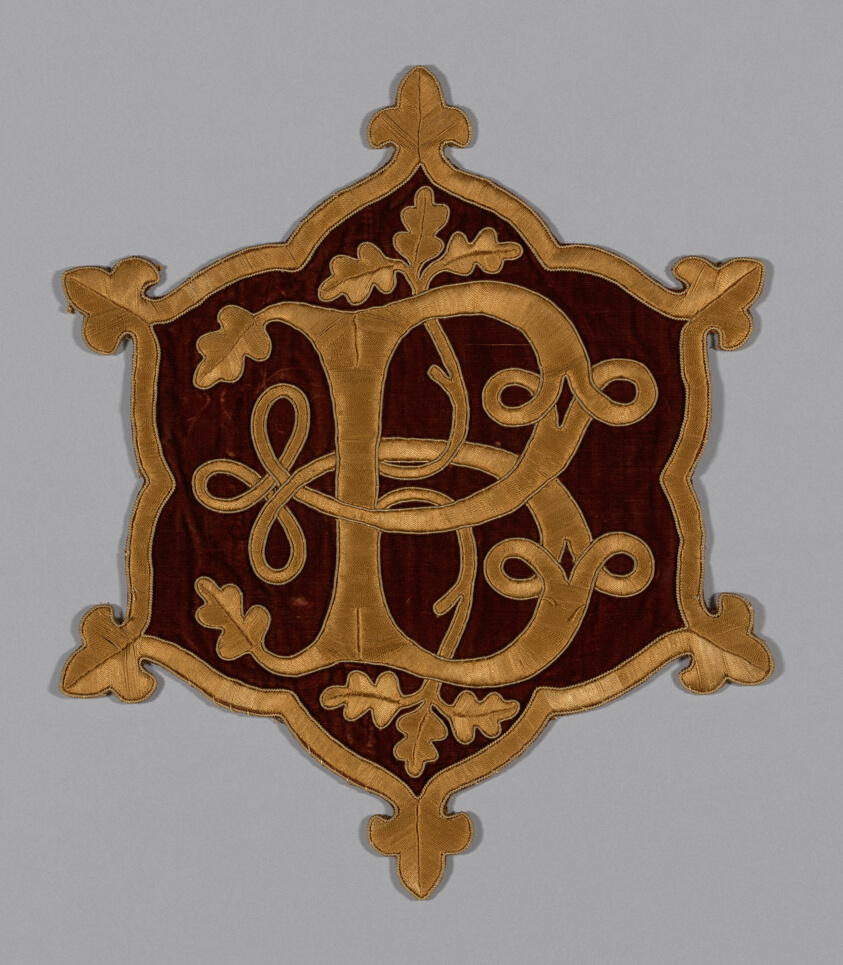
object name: Textile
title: Myddelton Biddulph Armorial Medallion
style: gothic revival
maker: Designed by Augustus Welby Northmore Pugin (English, 1812–1852) for Chirk Castle Red Drawing Room and Saloon; Wales, Wrexham, Chirk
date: c. 1846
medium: Linen, plain weave; appliquéd with silk, plain weave with supplementary pile warps forming cut solid velvet; embroidered with silk and silk-wrapped cotton in paper padded satin stitches; couching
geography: Wales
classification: needlework (visual works); textile